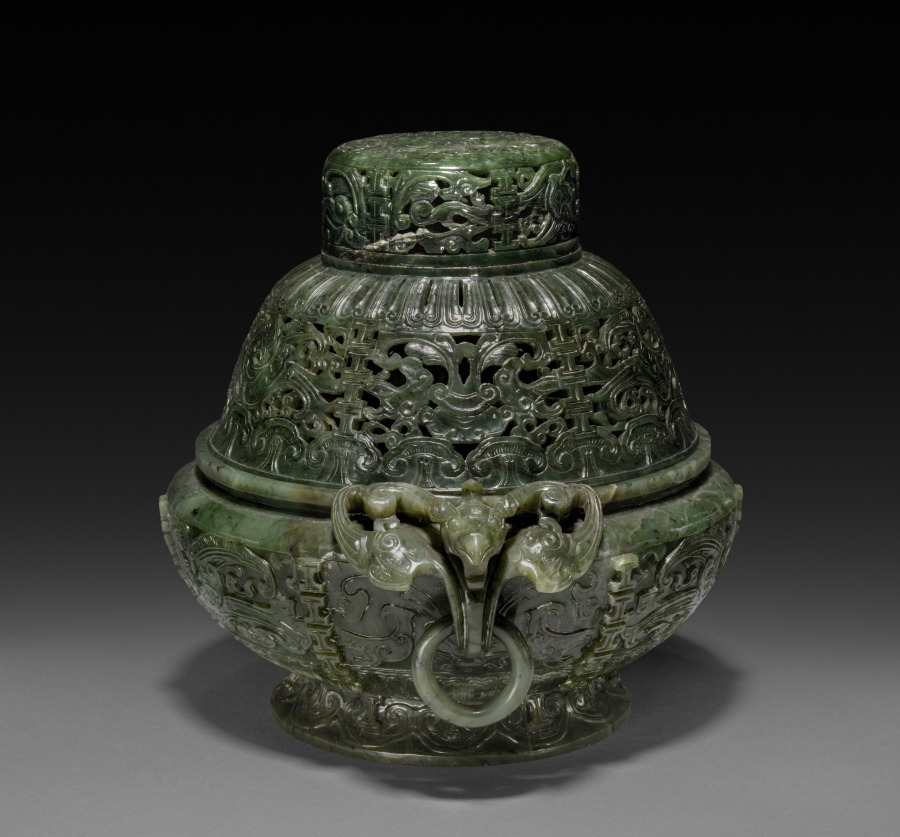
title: Koro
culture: China, Qing dynasty (1644–1911), Qianlong reign (1736–95)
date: 1736–95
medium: jade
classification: Jade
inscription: Qianglong mark on base